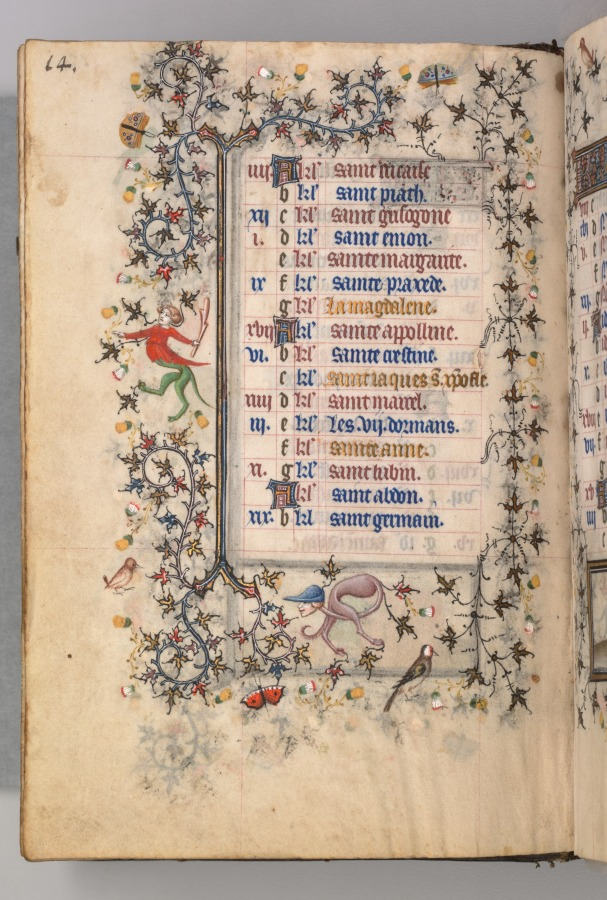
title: Hours of Charles the Noble, King of Navarre (1361-1425): fol. 7v, July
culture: France, Paris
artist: Master of the Brussels Initials and Associates (French)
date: c. 1405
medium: ink, tempera, and gold on vellum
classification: Bound Volume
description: This precious volume was obviously highly prized by its owner, the French-born King of Navarre, who had his coat of arms painted on no less than twenty folios. Rather than directly commissioning this manuscript from a specific workshop, it seems that Charles the Noble acquired his book of hours -- perhaps ready-made for the luxury market -- while on a trip to Paris in 1404-05. A collaborative effort, six painting styles are evidenced within the pages of this codex, those of two Italians, two Frenchmen, and two Netherlanders. The painter who was responsible for the planning and decoration of the book, and who produced seventeen of the large miniatures, was a Bolognese artist known as the Master of the Brussels Initials. His principal assistant, responsible for most of the borders, was a Florentine who signed his name "Zecho" da Firenze on folio 208 verso.